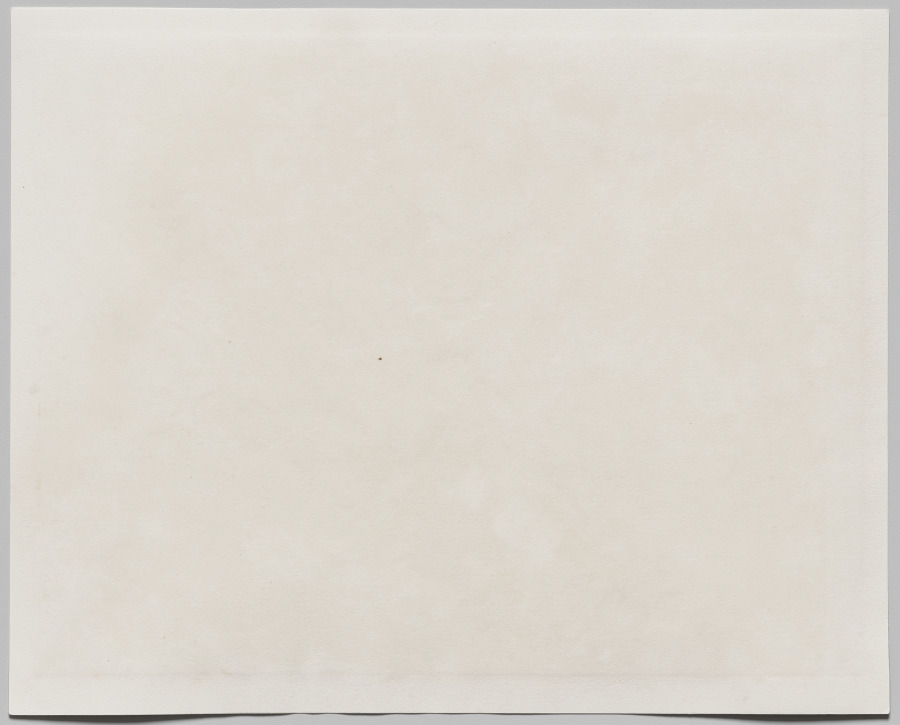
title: Palace of the Circus at Chicen-Itza (bas relief of tigers)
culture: France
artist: Claude-Joseph-Désiré Charnay (French, 1828–1915)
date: c. 1860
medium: albumen print from collodion negative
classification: Photograph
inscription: Imprinted on paper label adhered to recto, lower left: "Charnay, photogr. Pl. 34. Gide, éditeur, Paris./PALAIS DU CIRQUE, A CHICHEN-ITZA/Bas-relief des Tigres"